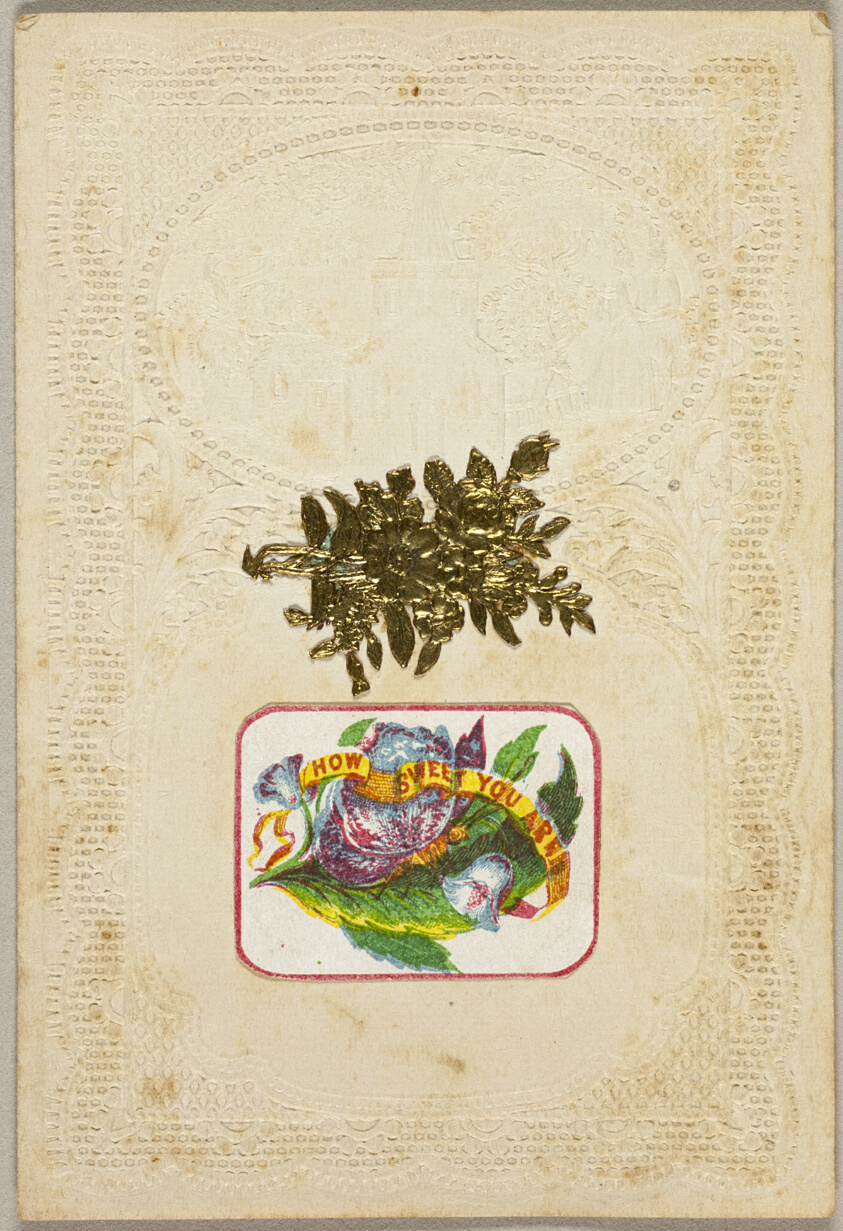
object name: Drawing and Watercolor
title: How Sweet You Are (Valentine)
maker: Unknown Artist; American or English, 19th century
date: c. 1840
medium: Collaged elements on embossed (designed) ivory wove paper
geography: United States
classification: collage; valentine; prints and drawing; paper